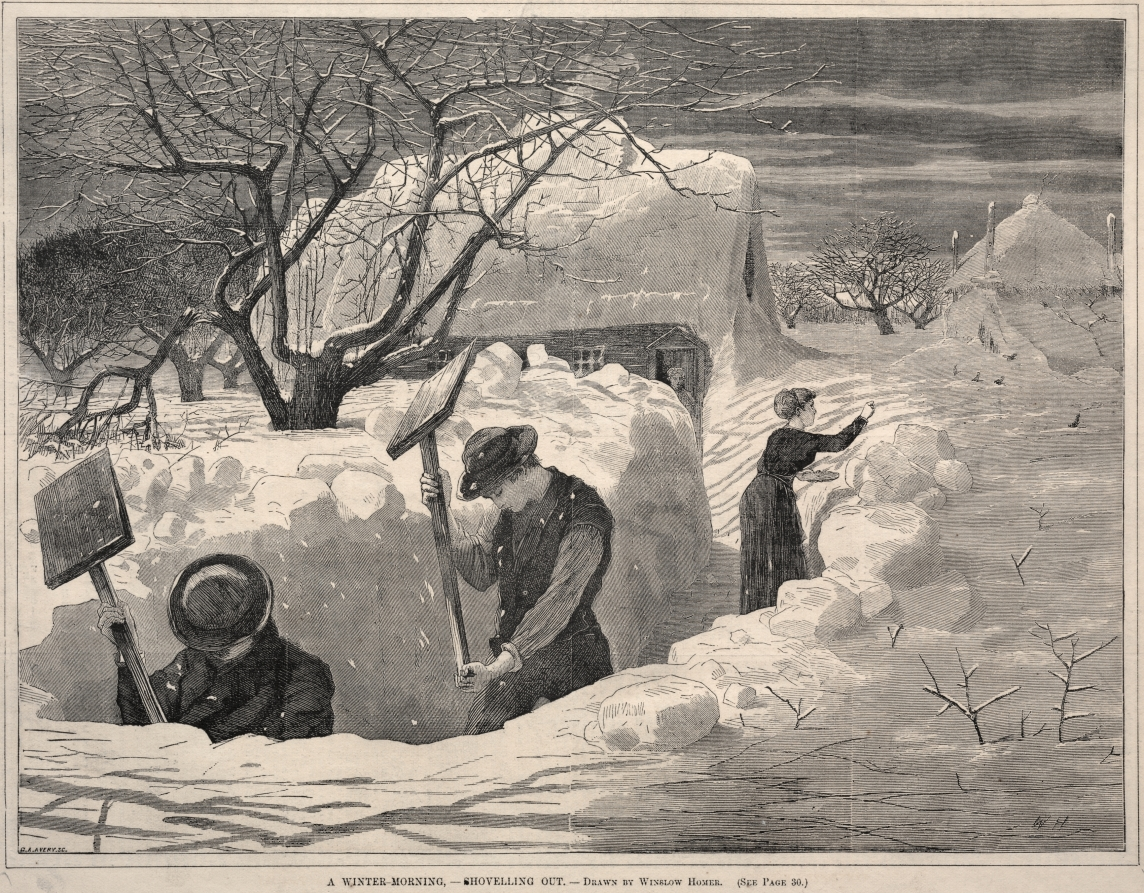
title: A Winter Morning, - Shovelling Out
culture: America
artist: Winslow Homer (American, 1836–1910)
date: 1871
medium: wood engraving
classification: Print